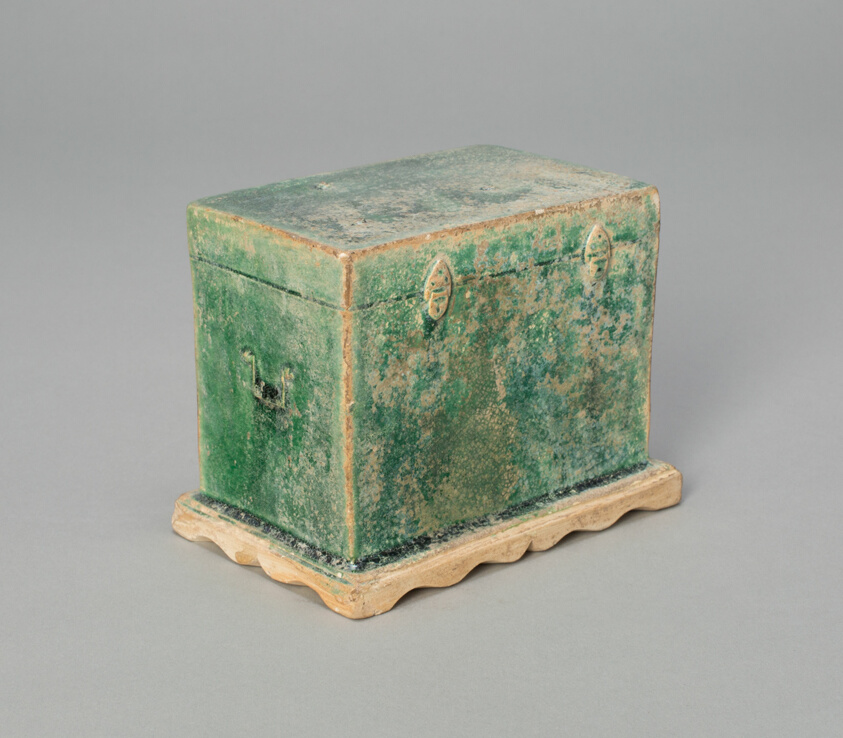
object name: Sculpture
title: Miniature Trunk (Mingqi)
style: Chinese (culture or style)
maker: China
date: Ming dynasty (1368–1644)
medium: Earthenware with green glaze and underglaze molded decoration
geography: China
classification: earthenware; asian art; ceramics; sculpture